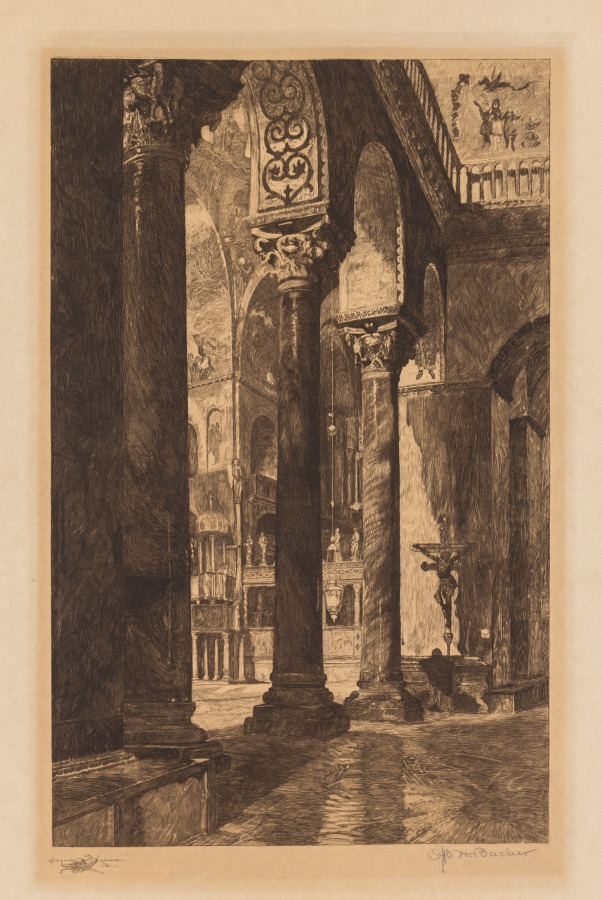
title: Interior of St. Mark's, Venice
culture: America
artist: Otto H. Bacher (American, 1856–1909)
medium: etching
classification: Print